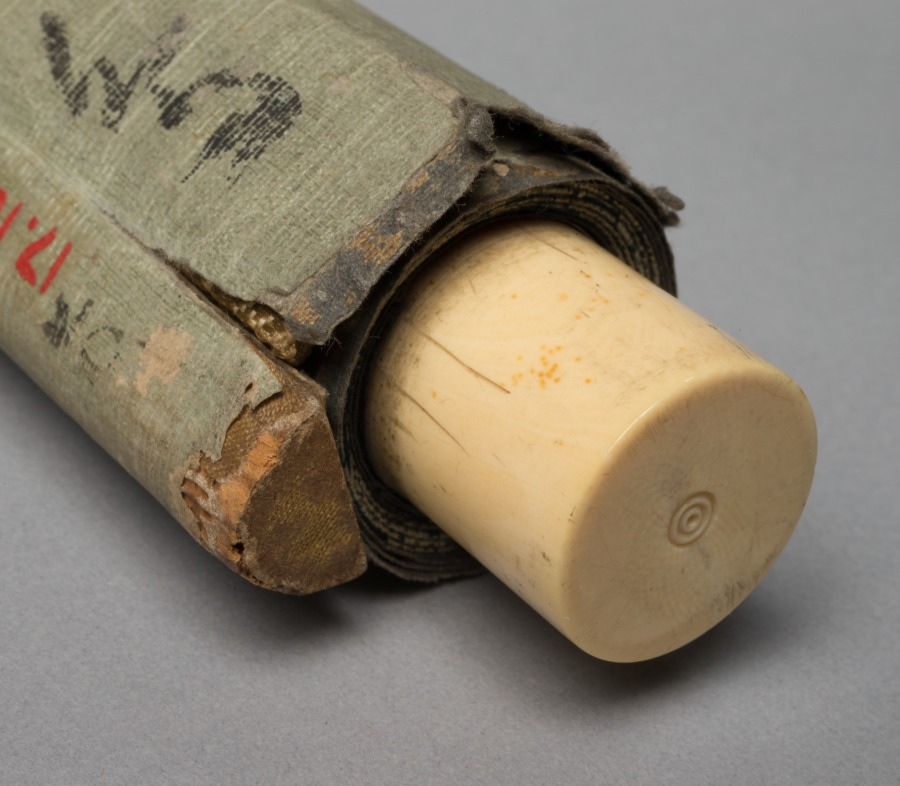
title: Ducks and Reeds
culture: Japan, Momoyama period (1573-1615) to Edo period (1615-1858)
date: early 1600s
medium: hanging scroll; ink on paper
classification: Painting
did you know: This painting was produced by a member of the Kano school.